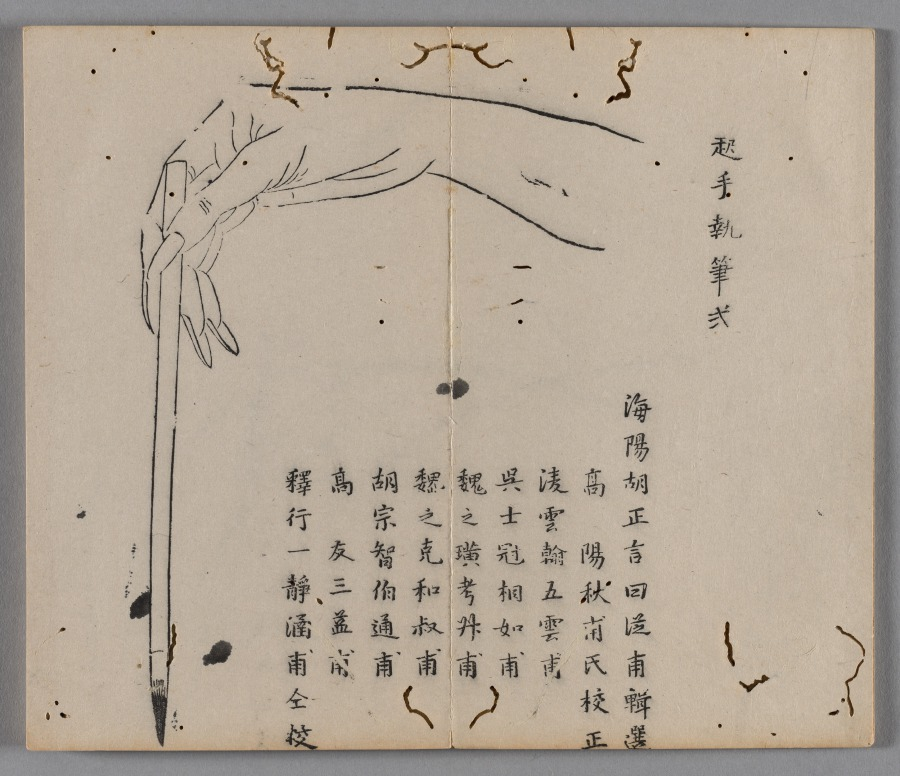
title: Ten Bamboo Studio Painting and Calligraphy Handbook (Shizhuzhai shuhua pu): Orchids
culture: China, Qing dynasty (1644-1911)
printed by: Hu Zhengyan (Chinese, c. 1584–1674)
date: 1633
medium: Woodblock-printed book; ink and colors on paper; first edition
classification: Print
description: Color printing reached a level of perfection in the early 1600s, as seen in this Ten Bamboo Studio Collection of Calligraphy and Painting and the Mustard Seed Garden Manual of Painting (printed 1679 and 1701). The painterly quality, precision in registering (aligning) the woodblocks, and harmonious colors made them the most successful color print editions in Chinese history. Both editions were printed and compiled in Nanjing, spread nationwide, and had a great impact on the arts in Japan and Korea.